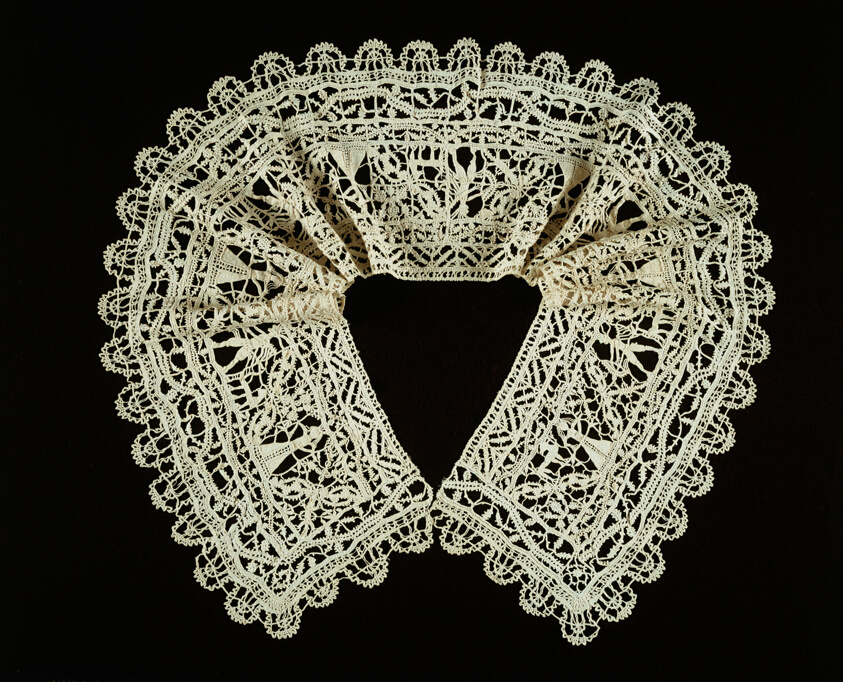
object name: Textile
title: Collar (Made from Border)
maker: Italy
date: 1575/1625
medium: Linen, three bands of needle lace worked on a plain weave; cut and drawn work grid; edged with bobbin straight lace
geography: Italy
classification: textile; lace - mixed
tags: fashion